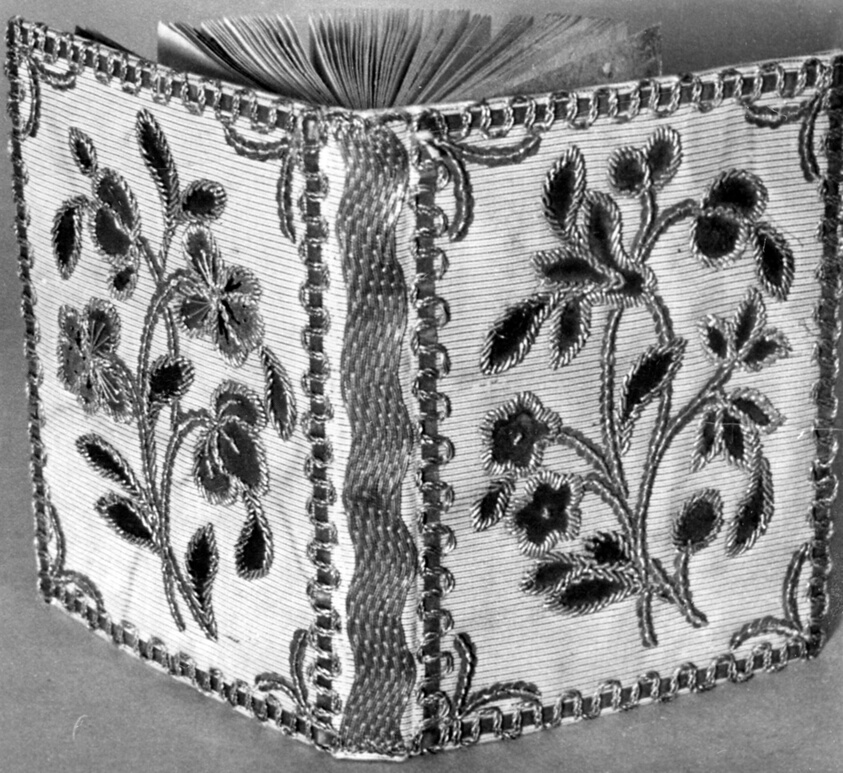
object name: Book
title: Almanac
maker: France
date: 1774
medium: Silk, warp-faced plain weave; embroidered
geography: France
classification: textile; book